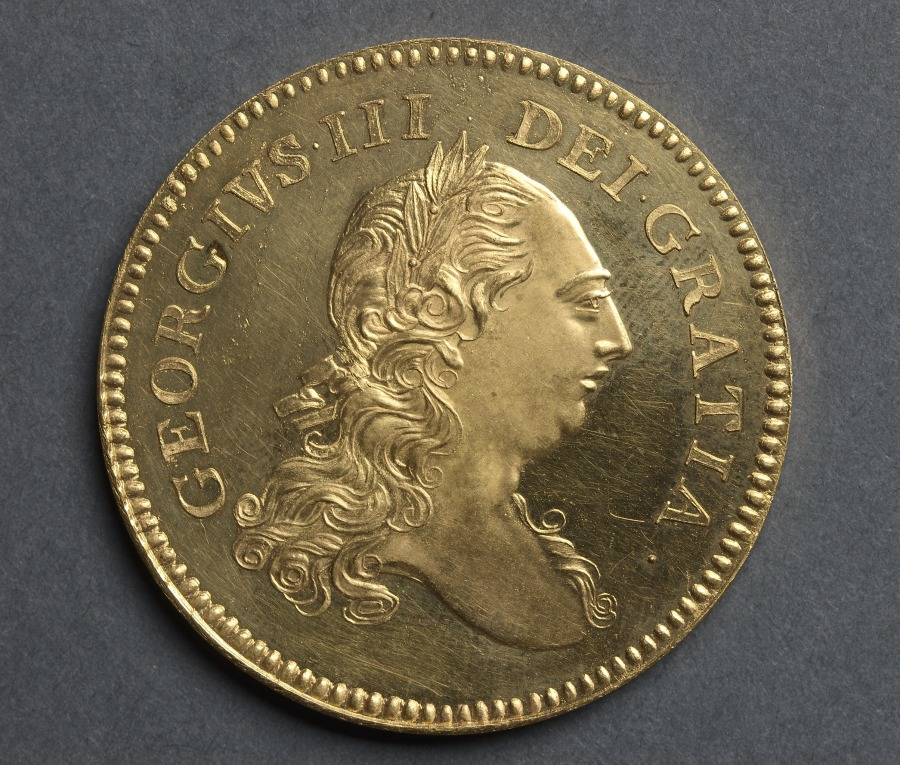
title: Five Guineas: George III (obverse); Shield of Arms (reverse)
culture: England, George III, 1760-1820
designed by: Richard Yeo (British, 1720–1779)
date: 1777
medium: gold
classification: Coins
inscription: DEI . GRATIA . GEORGIVS . III.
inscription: M.B.F.ET.H.REX.F.D.B.ET.L.D.S.R.I.A.T.ET.E 17 77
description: This is an extremely rare piece and one demonstrating the ability of the artist. Richard Yeo was appointed assistant engraver at the Royal Mint in 1749, chief engraver in 1775, and died in 1779. He was responsible for a large number of pattern pieces and for some of the currency coins of the period.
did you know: A pattern piece, this coin was not made for circulation.